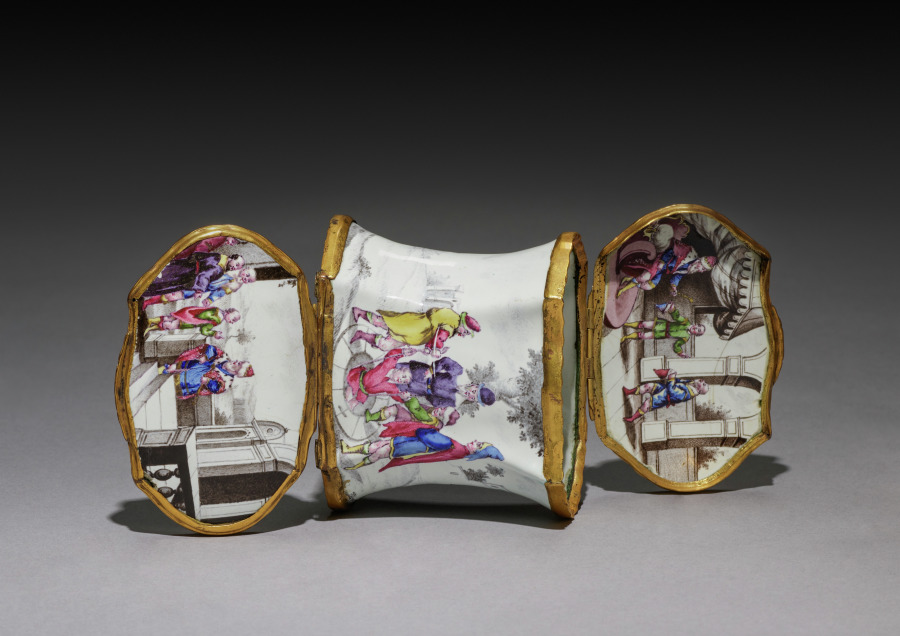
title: Box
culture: Germany, Augsburg, 18th century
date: c. 1730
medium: enamel on copper with metal mounts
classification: Miscellaneous